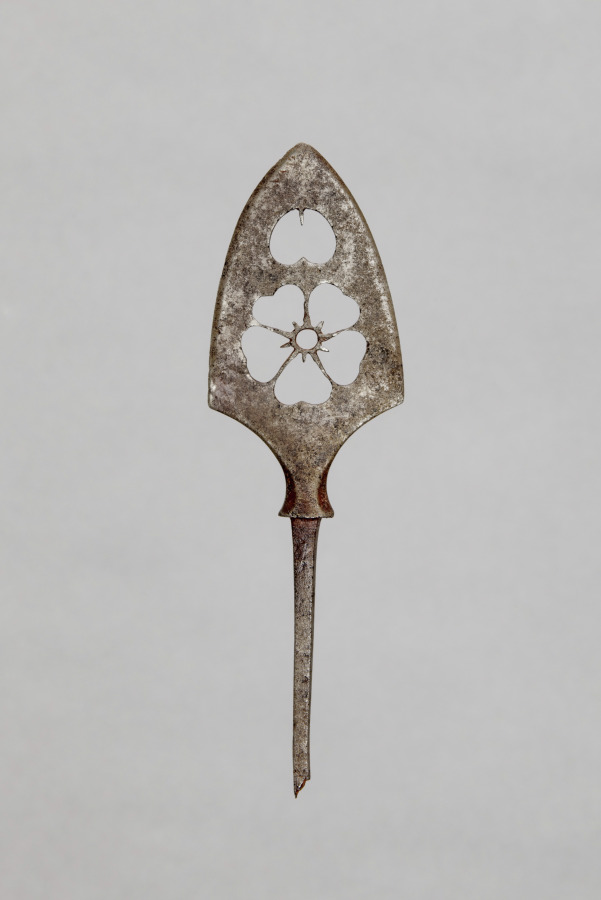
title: Arrow Point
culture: Japan, Edo period (1615–1868)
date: 1700s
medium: steel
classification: Arms and Armor